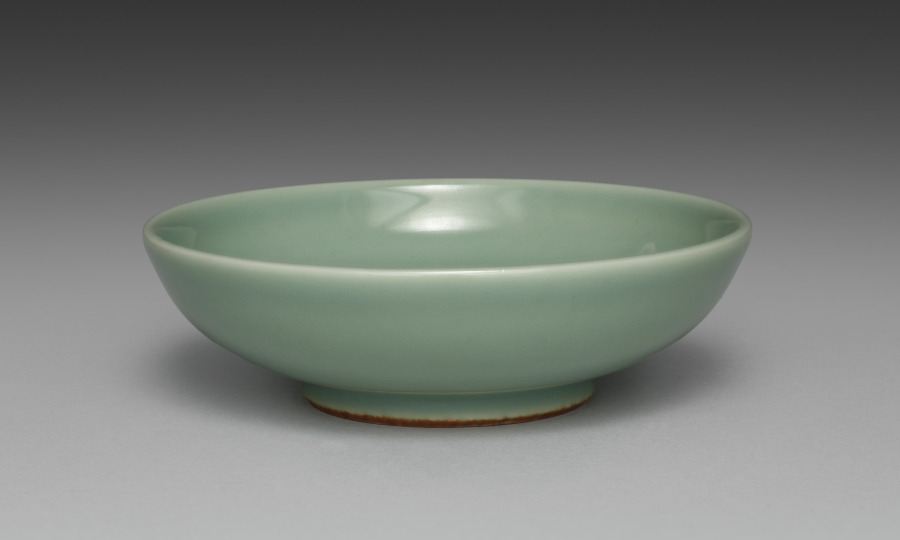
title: Dish from Dishes with Ivy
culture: Japan, Meiji period (1868–1912)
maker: Seifū Yohei III (Japanese, 1851–1914)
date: 1893–1914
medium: One from a set of five dishes; porcelain with green glaze and molded designs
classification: Ceramic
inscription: 清風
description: Yohei III’s main output for his sophisticated clientele was in the form of tea sets and dining sets. He often produced in pairs, sets of five, or sets of ten. This set of five dishes with a green glaze and designs of ivy vines in very low relief has unfortunately lost its box. These dishes are slightly larger than the other dishes, like CMA 2022.187, and so may have been not saucers but rather small plates for meals.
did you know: In his career, Seifū Yohei III created a range of dishes in green glazes.